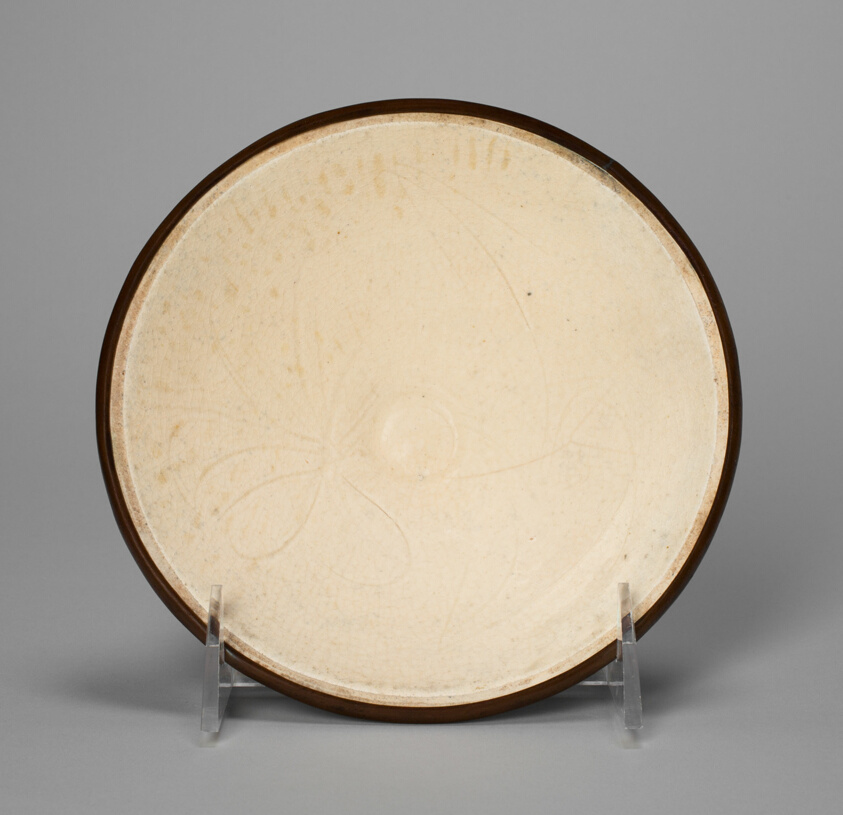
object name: Vessel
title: Bowl with Floral Scrolls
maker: China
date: Song dynasty (960–1279)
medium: Ding ware; stoneware with brown glaze, underglaze incised decoration, and copper rim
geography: China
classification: ceramics; asian art